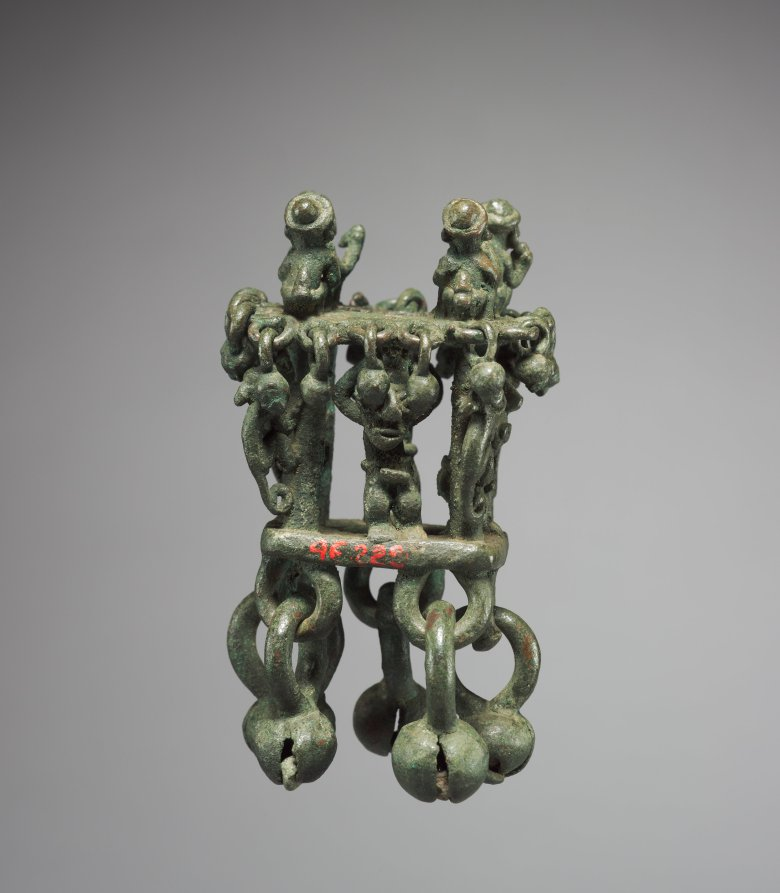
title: Finial of a Staff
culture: Peru, North Coast, Chimú style (900-1470)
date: Chimú style (900–1470)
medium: cast copper alloy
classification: Metalwork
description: Look carefully at this scepter top; the corrosion obscures details, but the scene is interesting.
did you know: Many ancient Andean artworks incorporate the element of sound.